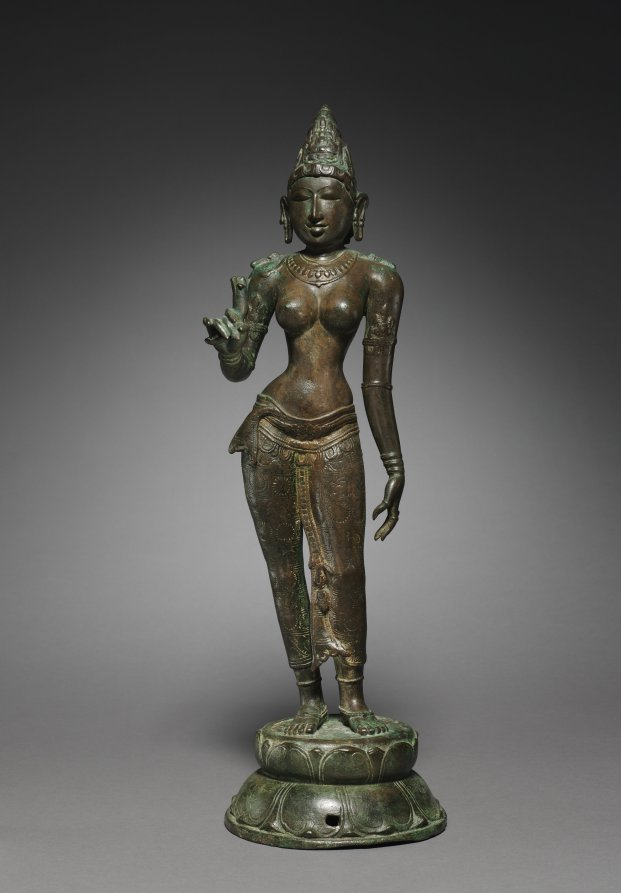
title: Goddess Holding a Lotus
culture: South India, Tamil Nadu, Chola period (900-13th Century)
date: c. 950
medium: bronze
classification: Sculpture